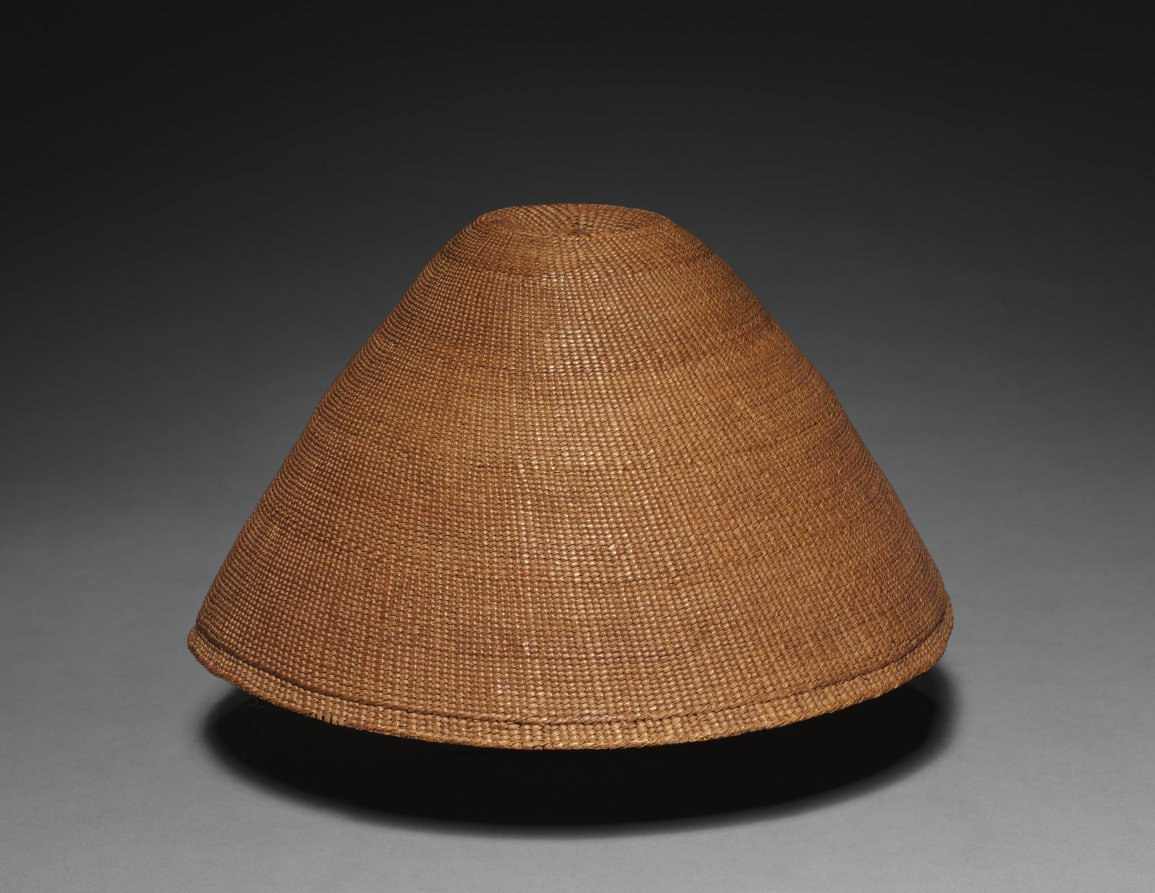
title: Hat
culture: Northwest Coast, Nuu-chah-nulth or Makah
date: before 1929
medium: cedar bark; twined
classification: Basketry